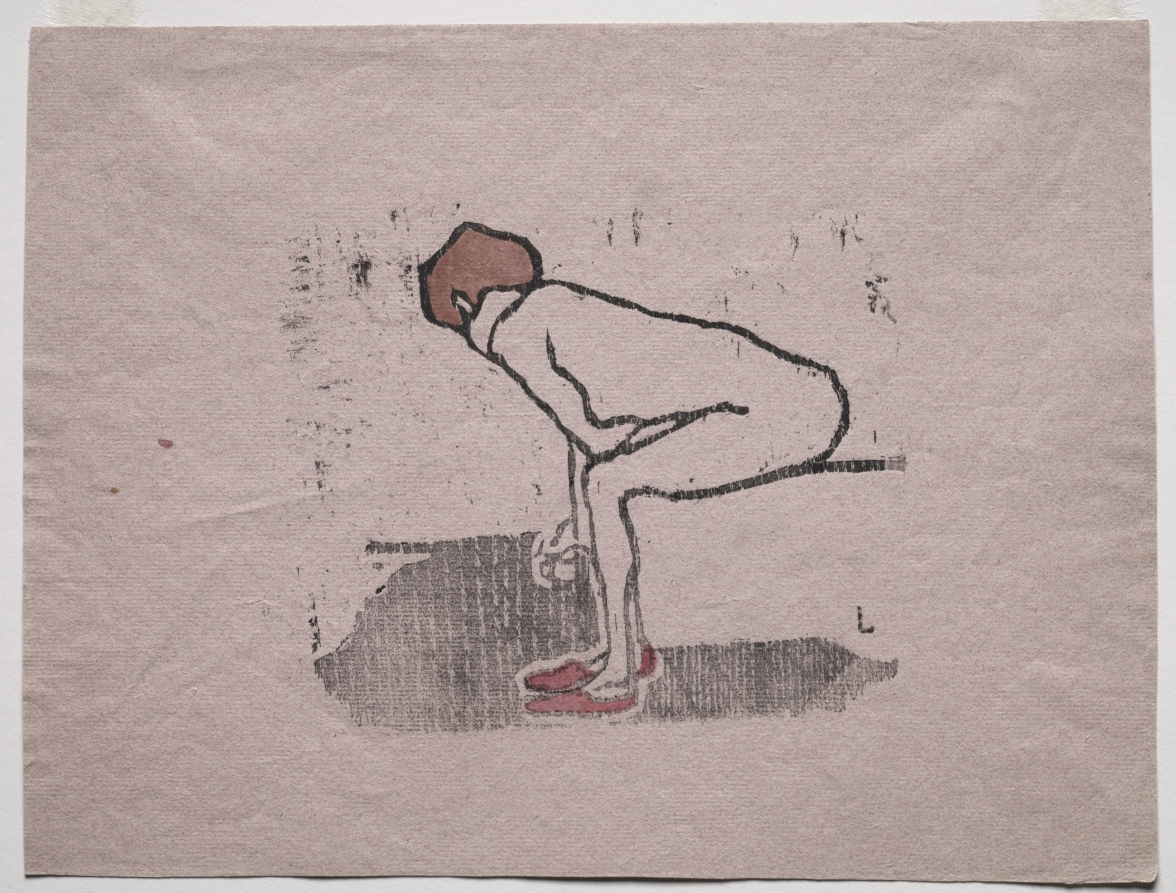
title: Before the Bath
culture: France, 19th century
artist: Fabien Vieillard (French, 1877–1904)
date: c. 1895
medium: woodcut with hand coloring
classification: Print